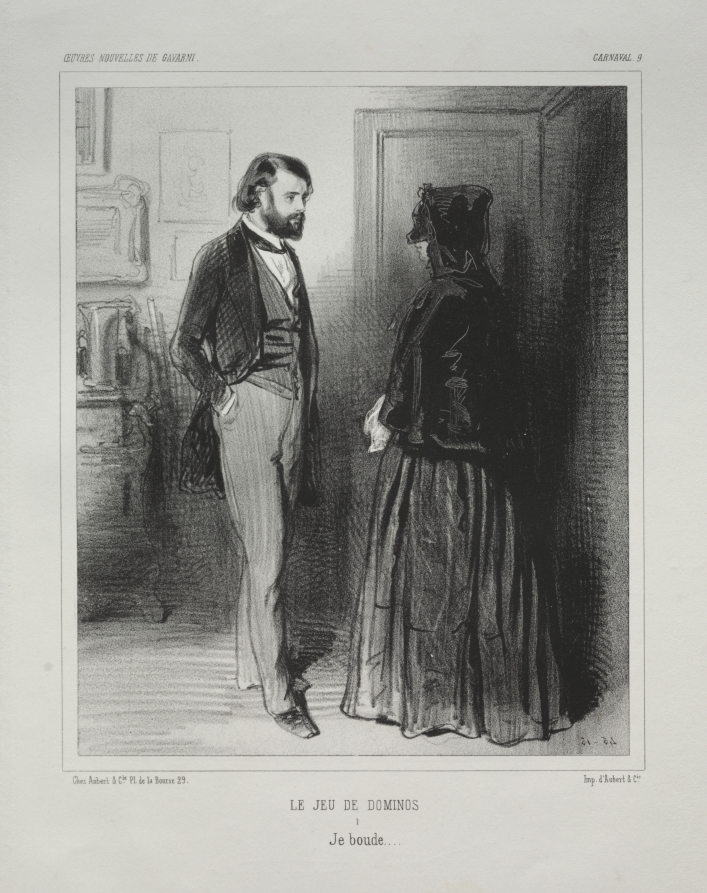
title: Carnaval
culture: France, 19th century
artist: Paul Gavarni (French, 1804–1866)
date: c. 1841–47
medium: lithograph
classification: Print